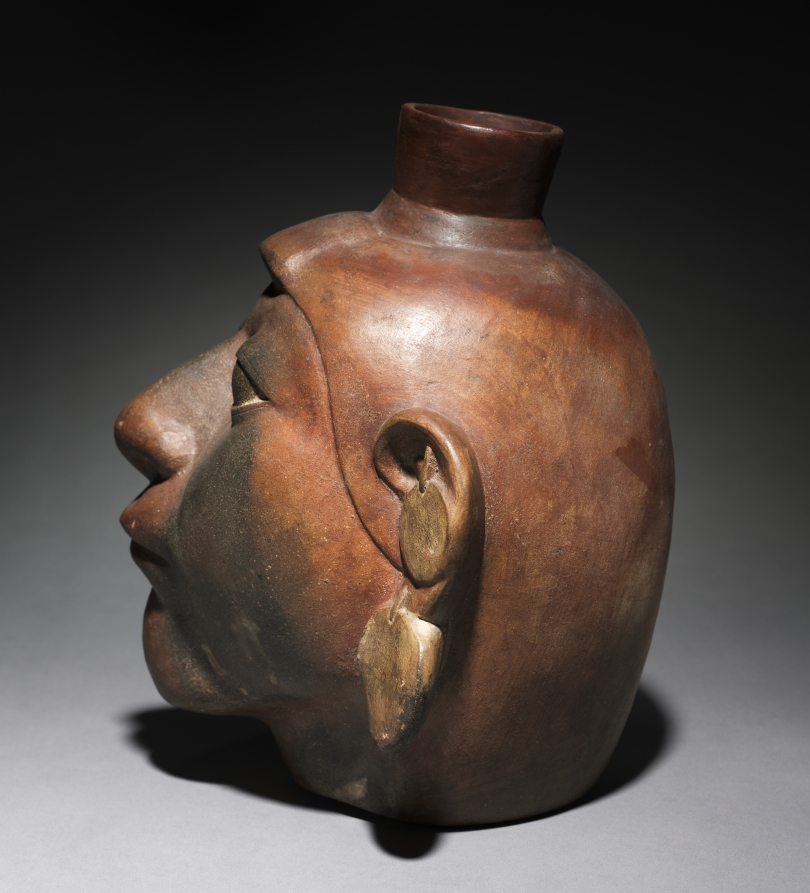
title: Portrait Head Vessel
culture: Peru, North Coast, Moche style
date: 200–550 CE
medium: earthenware with colored slips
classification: Ceramic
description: The Moche were unique in ancient Peru in creating realistic human portraits, usually in the form of ceramic vessels. This large example may represent an important captive who, like some Moche prisoner figures, wears double earrings and a hank of hair over the forehead.